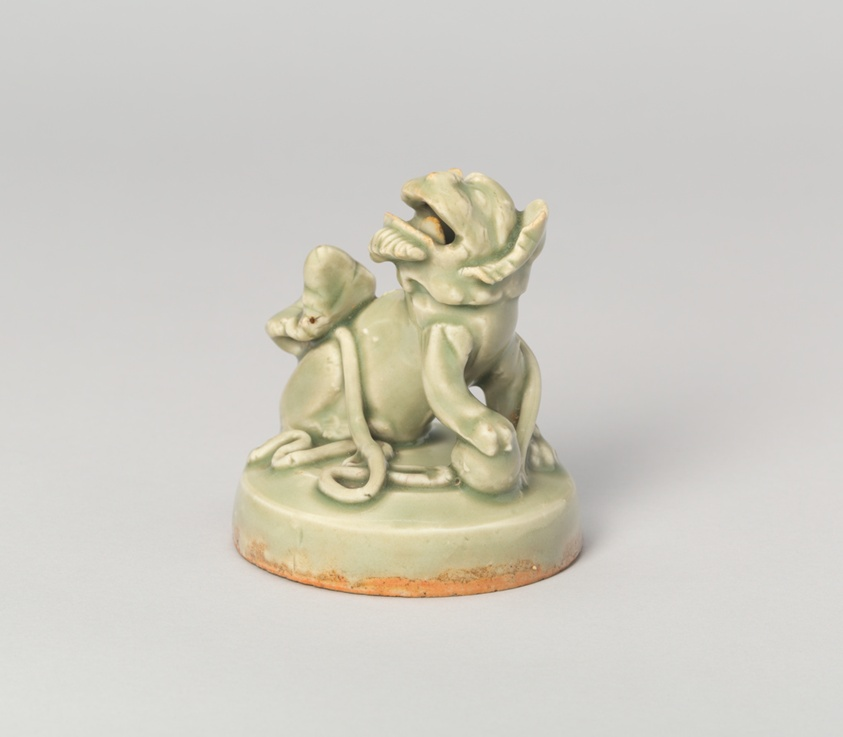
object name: Vessel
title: Lid with Lion-Dog, probably for Incense Burner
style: Chinese (culture or style)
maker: China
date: Northern Song dynasty (960–1127), c. 12th century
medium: Yaozhou ware; stoneware with underglaze molded decoration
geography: China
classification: ceramics; vessel